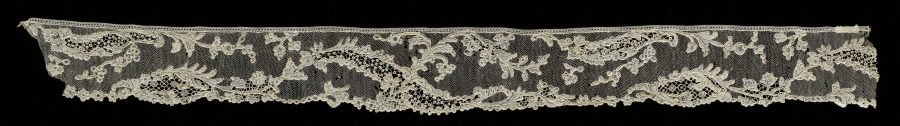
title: Lace Edging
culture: France, Alençon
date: 1700s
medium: Linen: needle lace (Point d'Alençon)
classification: Lace